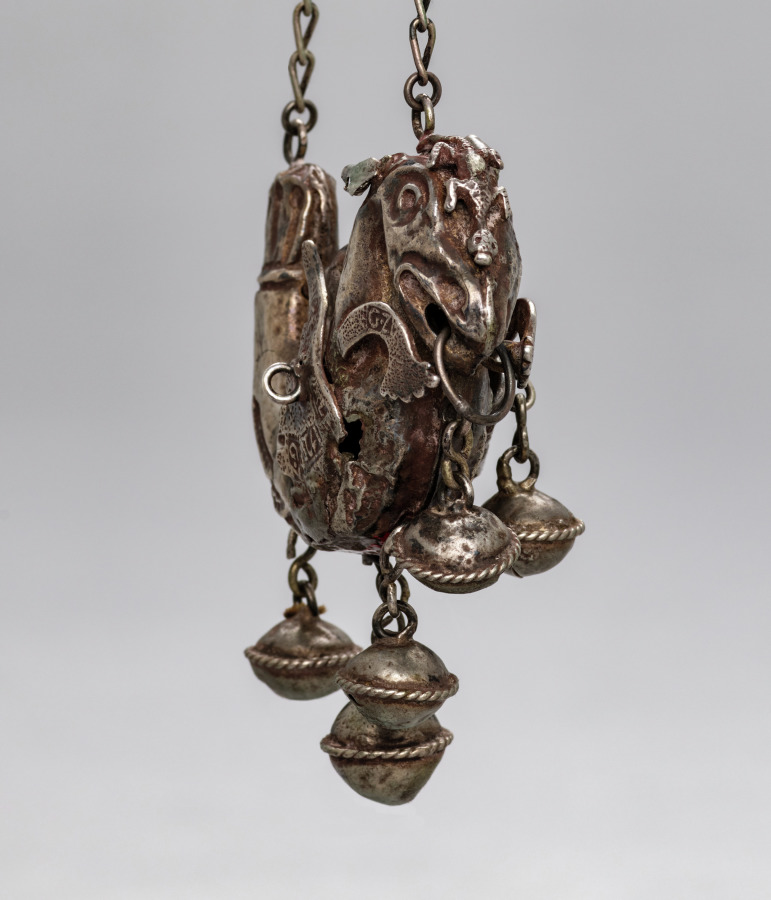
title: Rattle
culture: Italy, Sicily, 18th century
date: 1700s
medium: silver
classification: Silver